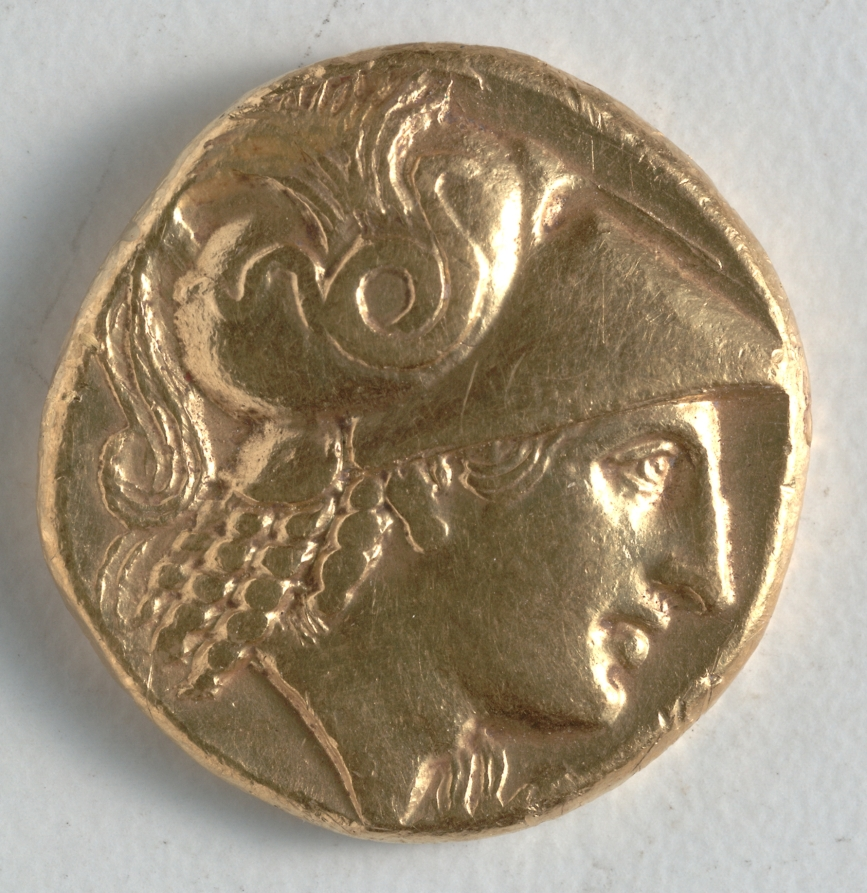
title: Stater: Head of Athena (obverse)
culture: Greek, Macedonian, minted at Abydos (Mysia), reign of Philip III Arrhidaios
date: 323–317 BCE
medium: gold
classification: Coins